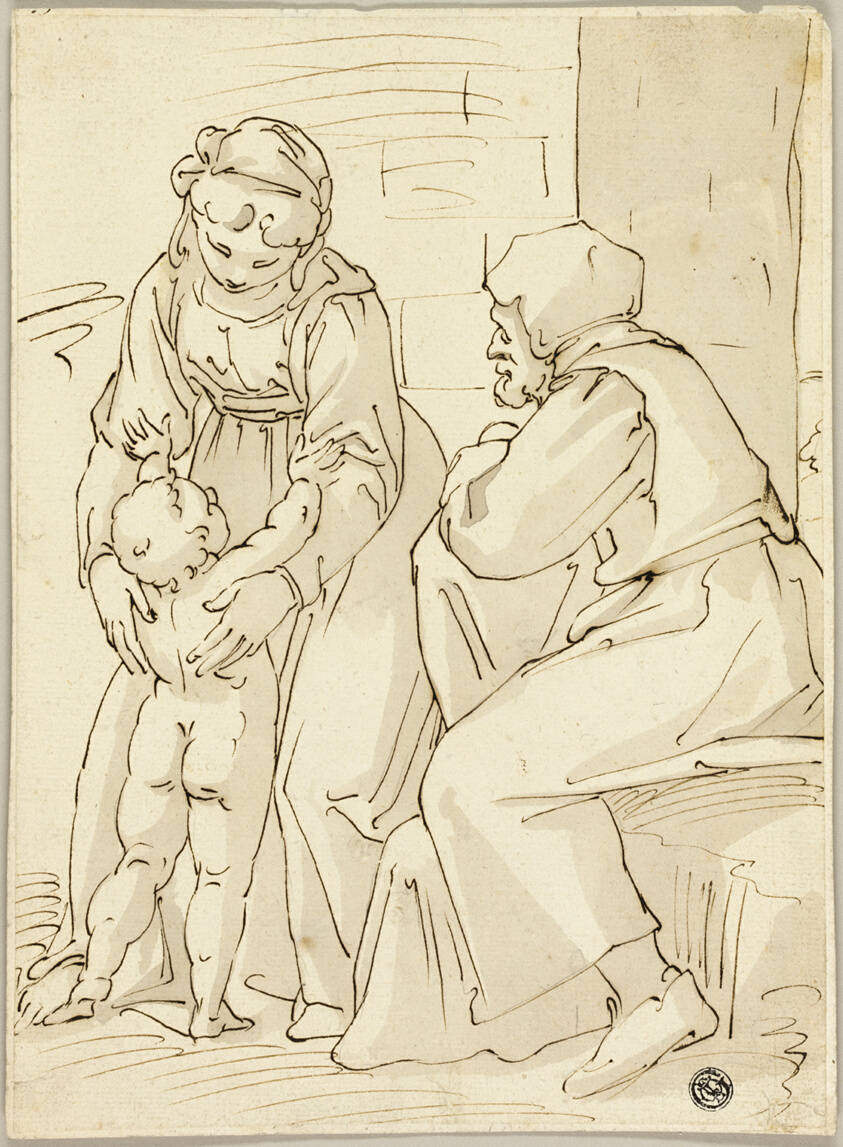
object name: Drawing and Watercolor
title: Holy Family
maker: After Luca Cambiaso; Italian, 1527-1585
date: c. 1570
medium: Pen and brown ink with brush and brown wash, and traces of graphite, on cream laid paper, laid down on tan laid paper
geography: Italy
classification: ink with wash; drawings (visual works); prints and drawing